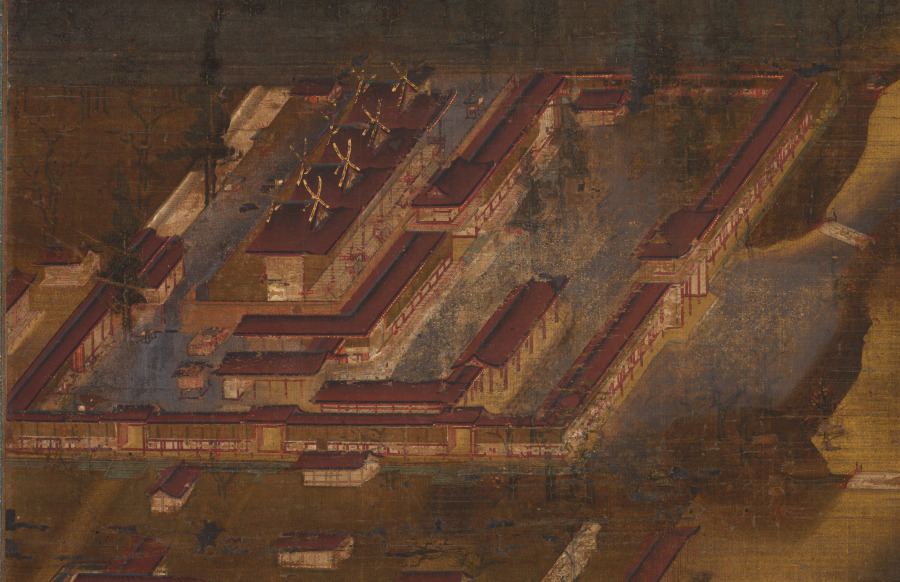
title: Kasuga Shrine Mandala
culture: Japan, Kamakura period (1185–1333)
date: early 1300s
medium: Hanging scroll; ink, color, and gold on silk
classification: Painting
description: A golden path beginning at the bottom of this painting leads up to four red-and-white buildings to the left, then to a fifth building on the right. These are the five shrine halls of Kasuga Taisha in Nara. Above and beyond the buildings is a sacred mountain range––with Mount Mikasa at center, Mount Wakakusa in gold to the left, and the sun or moon rising up behind the mountains. Sacred deer appear here and there. Five figures representing the original Buddhist forms of the five kami of the shrine complex stand on clouds above the mountains.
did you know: Sacred deer, the vehicles of the Kasuga deities, move about the shrine compound.